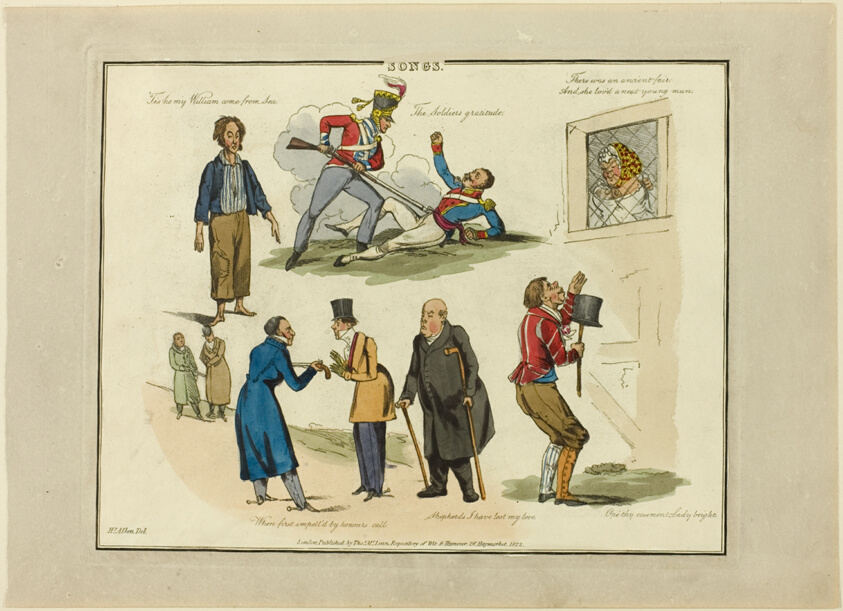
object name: Print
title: Plate from Illustrations to Popular Songs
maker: Henry Alken (English, 1785-1851); published by Thomas McLean (English, active 1790-1860)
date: 1822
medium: Soft ground etching with hand-coloring and aquatint on paper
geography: England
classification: etching; print; prints and drawing